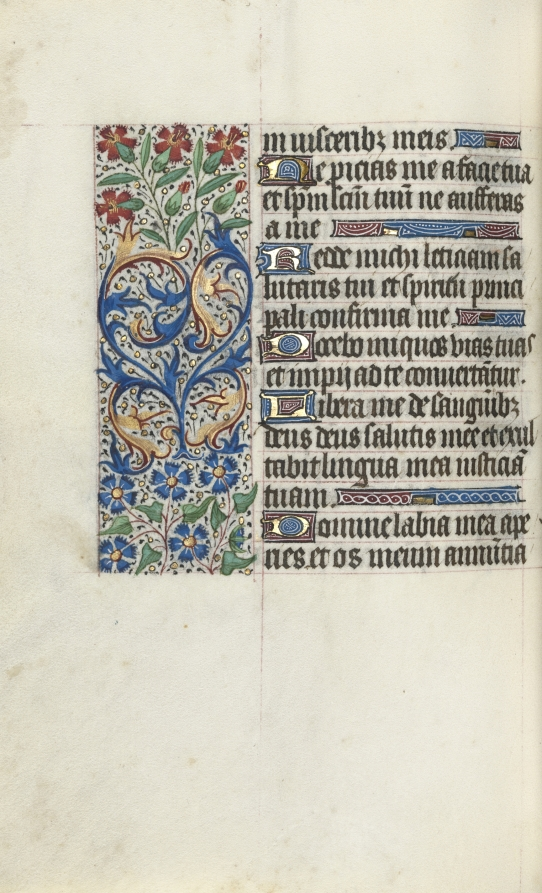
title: Book of Hours (Use of Rouen): fol. 86v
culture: France, Rouen, 15th century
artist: Master of the Geneva Latini (French, active Rouen, 1460–80)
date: c. 1470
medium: ink, tempera, and gold on vellum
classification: Bound Volume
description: In the late 1400s and early 1500s Rouen was an established and important center of book production. The city’s cathedral had a wealthy chapter that spent large sums of money to commission books and to maintain its extensive library. The stationers and booksellers would have likely been concentrated in or near the cathedral precinct. This artist, named after a manuscript now in Geneva, was Rouen’s principal illuminator during the second half of the 1400s.